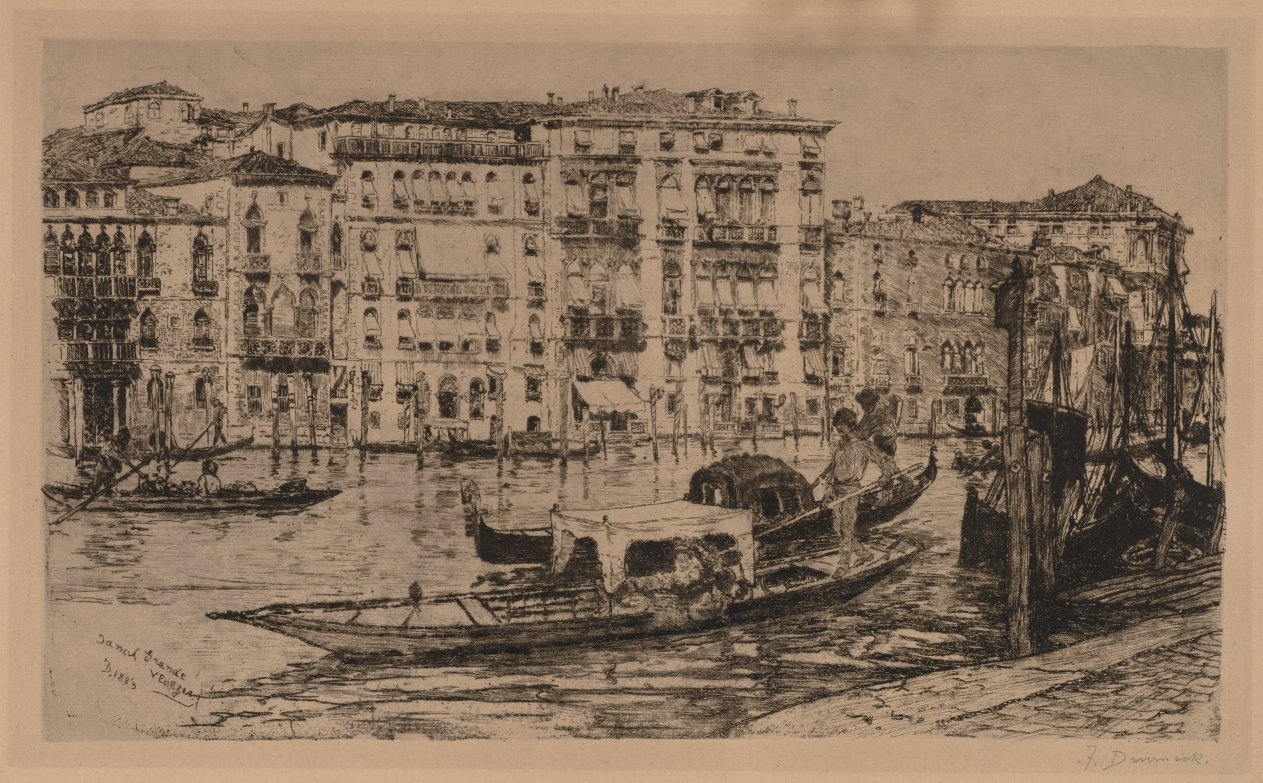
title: Grand Canal, Venice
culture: America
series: Desdemona's House, Grand Canal, Venice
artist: Frank Duveneck (American, 1848–1919)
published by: Frederick Keppel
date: 1889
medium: etching with pencil additions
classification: Print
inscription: Lower margin, in pencil: "F. Duveneck"